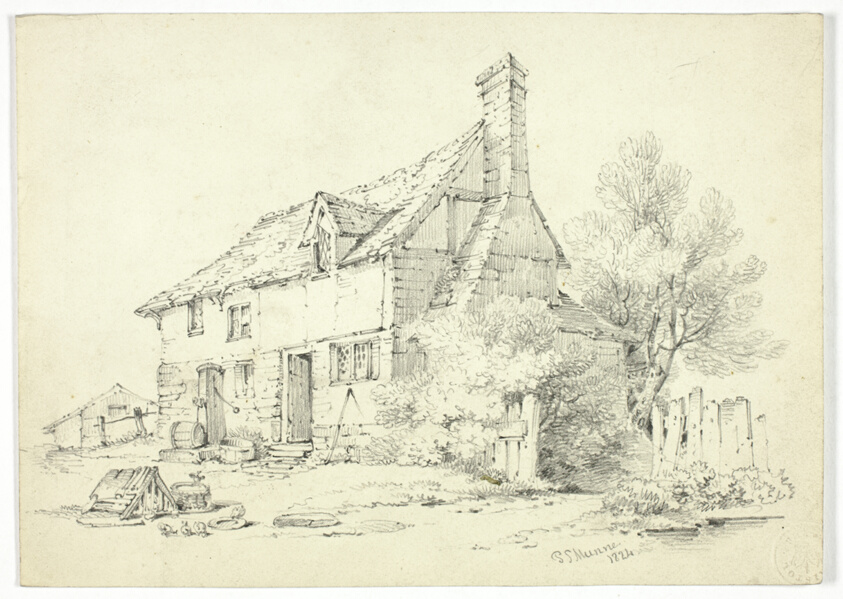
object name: Drawing and Watercolor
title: Countryside Cottage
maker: Paul Sandby Munn (English, 1773-1845)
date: 1824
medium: Graphite, with spray fixative, on ivory wove paper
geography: England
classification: graphite; drawings (visual works); prints and drawing